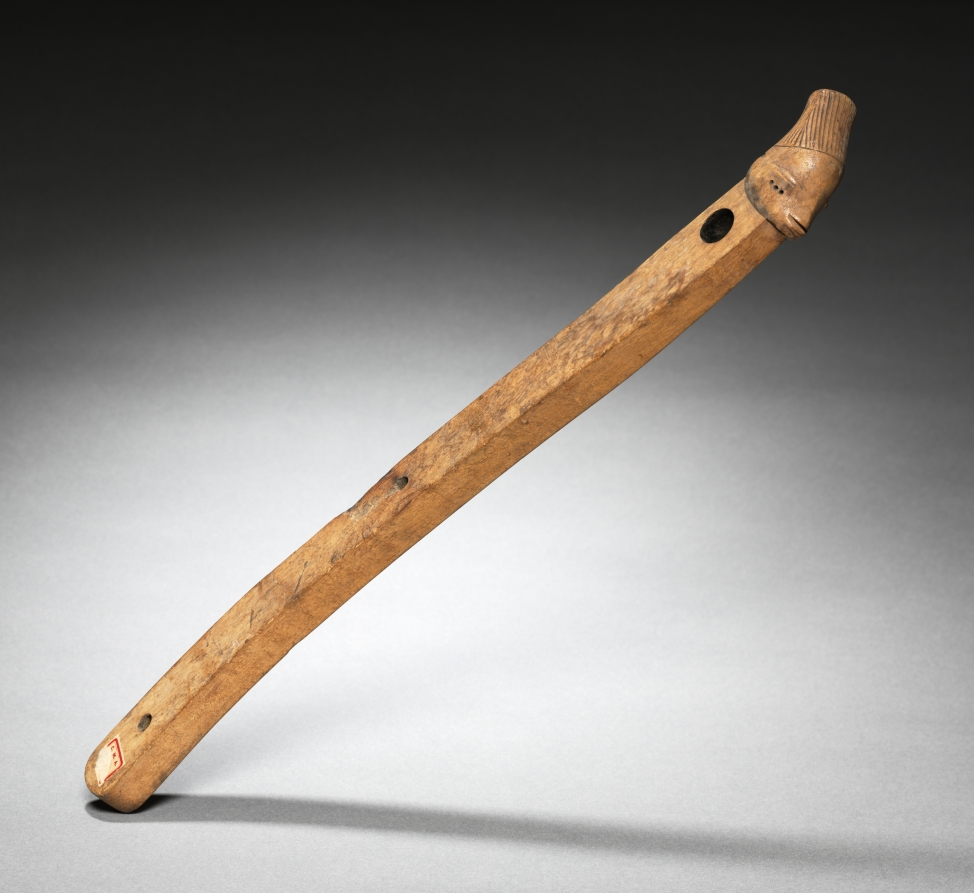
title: Part of a chair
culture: Africa, Central Africa, Democratic Republic of Congo, Mangbetu style, unknown carver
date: 1900s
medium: Wood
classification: Furniture and woodwork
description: This wooden piece is part of a folding chair. Along with a similarly shaped and ornamented piece, it was part of the frame for the plaited reed seat. The holes were functional and allowed the frame of the chair to open or close. The most elaborate decoration was reserved for the upper back of the chair. The simple carving at the top of this fragment depicts a Mangbetu woman with an elongated head.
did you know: When chairs were used, their wood became a rich, dark brown. The light color of this fragment suggests it was never used and may never have been assembled into a chair.